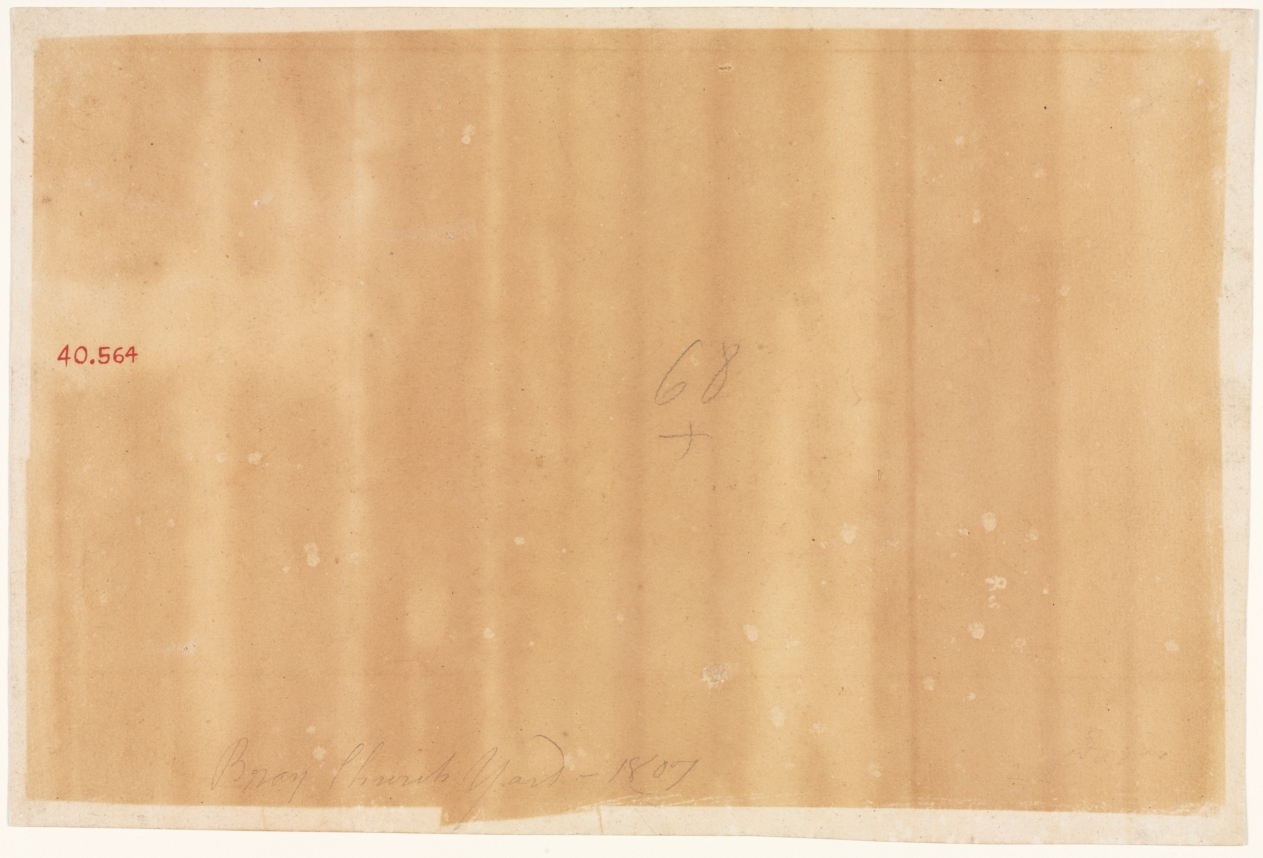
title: Bray Church Yard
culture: England, 19th century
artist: John Varley (British, 1778–1842)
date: 1807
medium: watercolor and graphite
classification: Drawing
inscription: inscribed, in graphite, on verso, at lower left: BrayChurch Yard - 1807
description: The inscription on the reverse of this drawing, "Bray Church Yard-1807," likely refers to St. Michael’s, the parish church in the village of Bray on the banks of the Thames in the county of Berkshire. The banks of the lower Thames Valley provided the subject matter for many of John Varley’s early watercolors. His pursuit of the picturesque led the artist to turn his back on London and its connotations of commerce and industry, focusing instead on the rural aspects of the scene.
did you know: Although rare, John Varley's early watercolors are considered his most inspired work.